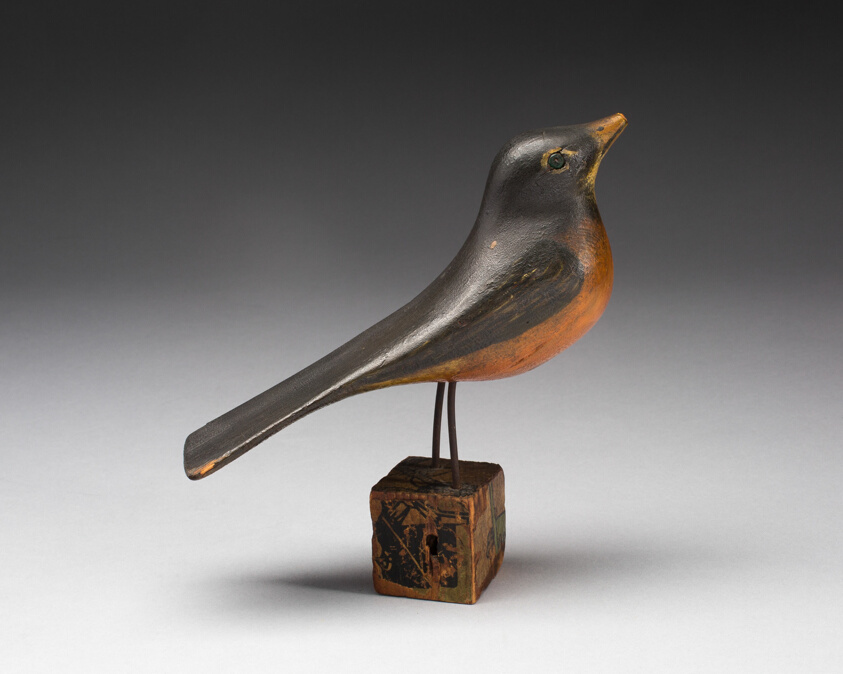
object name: Decorative Arts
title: Robin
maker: Artist unknown (American, active 19th century); Pennsylvania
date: 1860–1900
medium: Pine, paint, printed materials, iron, glass, and paper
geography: Pennsylvania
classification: sculpture; american decorative arts; american arts; decorative arts